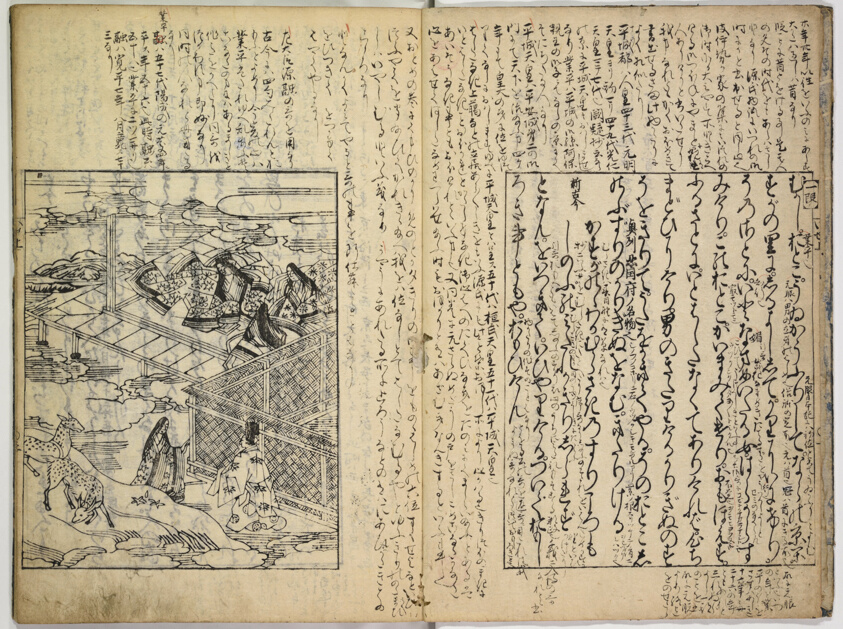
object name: Book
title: Tales of Ise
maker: Artist unknown, Japanese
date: 1659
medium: Woodblock-printed book; 2 vols.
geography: Japan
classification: book